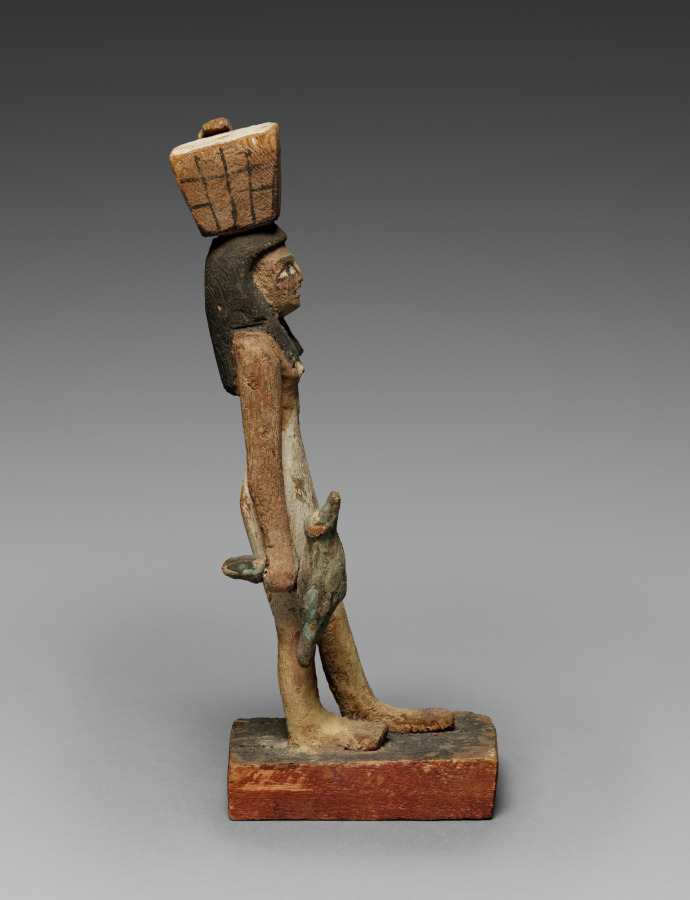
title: Female Offering Bearer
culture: Egypt, Middle Kingdom (2040–1648 BCE), Dynasties 11–12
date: 2000–1801 BCE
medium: painted wood, figure of tamarisk(?), base of sycamore fig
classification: Wood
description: The offering bearer wears a basic wraparound kalasiris dress and a strap that connects to the dress over her left shoulder. It is not known whether straps on ancient Egyptian dresses were designed as a part of the garment or were separate attachments for fashionable or utilitarian purposes. Ancient Egyptian illustrations typically identify women who wore this garment with a strap as servants, whereas artisans depicted men of all socioeconomic levels wearing the version for men.